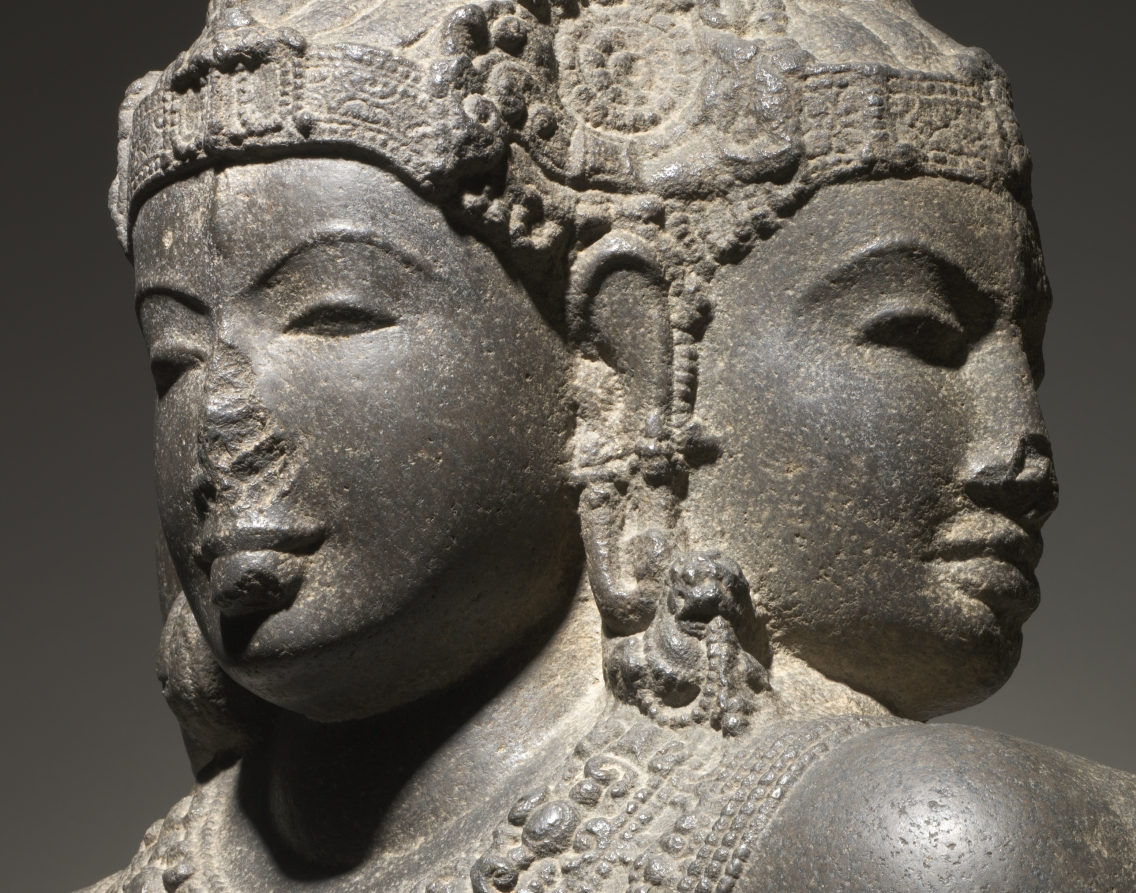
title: Brahma-Shiva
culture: South India, Tamil Nadu, Chola dynasty, late 10th - early 11th century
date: late 900s–1000s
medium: granite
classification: Sculpture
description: In the Hindu pantheon Brahma is in charge of carrying out the work of creation. In this tour-de-force of South Indian temple sculpture, he is in a special regal aspect, with the only elements of his typical priestly appearance being the prayer beads and the matted dreadlocks piled on his head. Four arms connote superhuman power, and four heads convey the idea that his creative activities spread in all four directions. His upper right hand enjoins freedom from fear, and the lower holds a lotus bud associated with birth and the process of creation. His lowered left hand is held in the gift-giving gesture, suggestive of the gift of creation he will bestow upon the world.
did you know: The back of the sculpture retains the original textured surface from a pointed chisel, suggesting it was in a niche or near a wall, protected from worshippers’ touches.